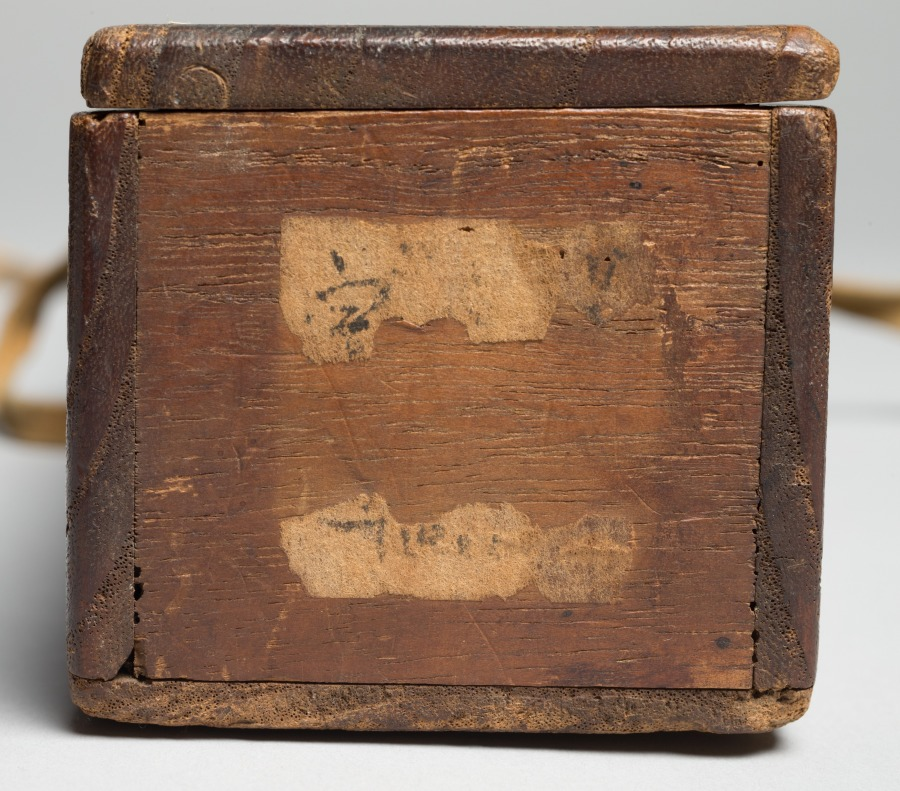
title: Kenshu, Monk with Shrimp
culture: Japan, Edo period (1615–1868)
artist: studio of Tawaraya Sōtatsu (Japanese, c. 1570–c. 1640)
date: c. 1600–1640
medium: hanging scroll; ink on paper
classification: Painting